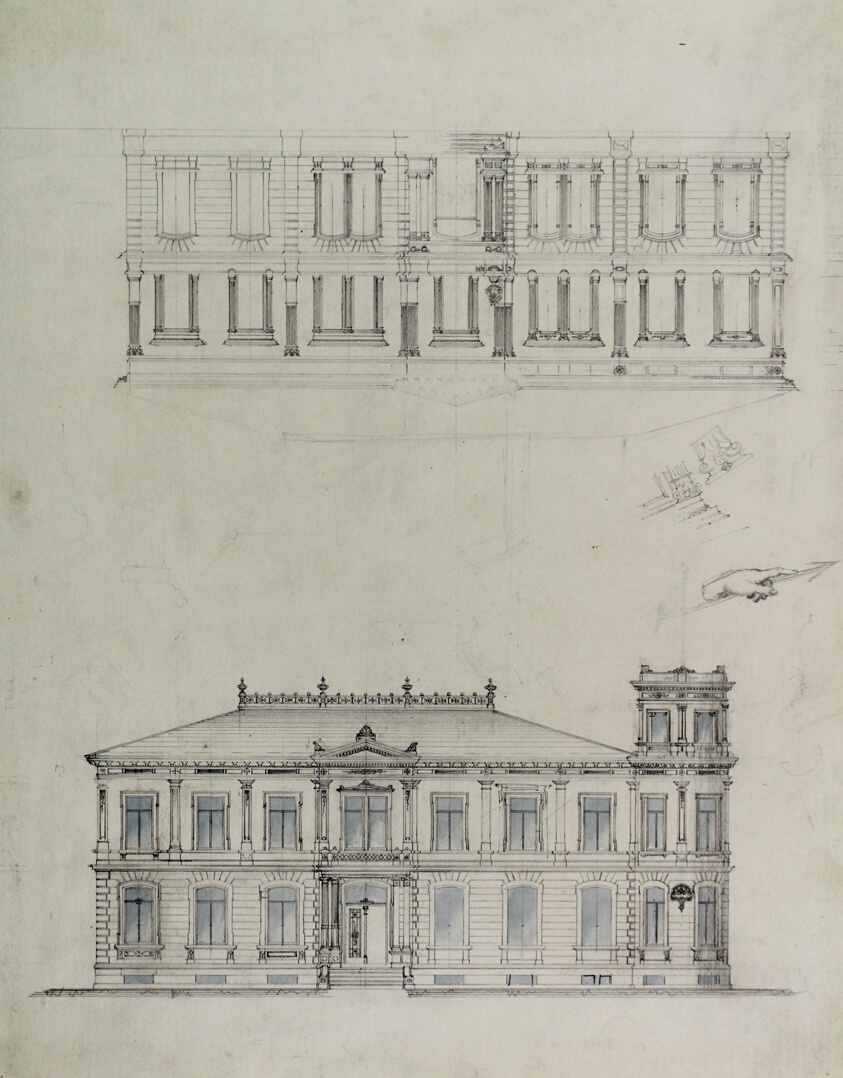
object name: Architectural Drawing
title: Design Projects, House Elevation Studies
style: 19th century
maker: Carl (Charles) J. Furst (American, born Germany c. 1840–c. 1919)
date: c. 1860–1870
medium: Graphite and water color wash on drawing paper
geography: United States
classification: architectural drawing; architecture; design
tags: houses, architecture, design, projects